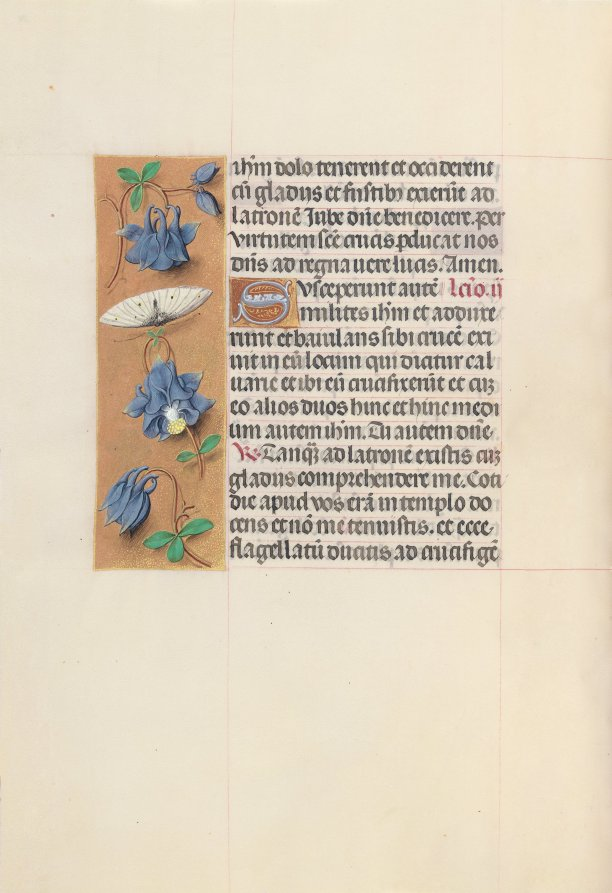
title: Hours of Queen Isabella the Catholic, Queen of Spain: Fol. 54v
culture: Flanders, Ghent and Bruges, late 15th century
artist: Master of the First Prayerbook of Maximillian (Flemish, c. 1444–1519)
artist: and Associates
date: c. 1500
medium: ink, tempera, and gold on vellum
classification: Bound Volume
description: This manuscript was illuminated by a circle of at least five highly organized manuscript painters active in the Flemish cities of Ghent and Bruges. The principal illuminator was Alexander Bening, who painted the majority of the book's miniatures. Manuscripts produced by this circle of artists are renowned for the decoration of their borders, which typically feature a rich variety of realistically-painted flowers, birds, and butterflies. This prayer book, called a book of hours, was intended not for a cleric, but for the private devotions of a lay person-in this case, Isabella the Catholic, Queen of Spain (1451-1504). Isabella's coat of arms embellishes the book's frontispiece. It is unlikely that the book was commissioned by the Queen herself; rather, she probably received it as a diplomatic gift from someone courting her patronage, perhaps Cardinal Francisco Jimenez de Cisneros. A Franciscan friar, Jimenez was dependent upon Isabella for his advancement, first to the post of Queen's confessor in 1492, and then to Archbishop of Toledo in 1495.